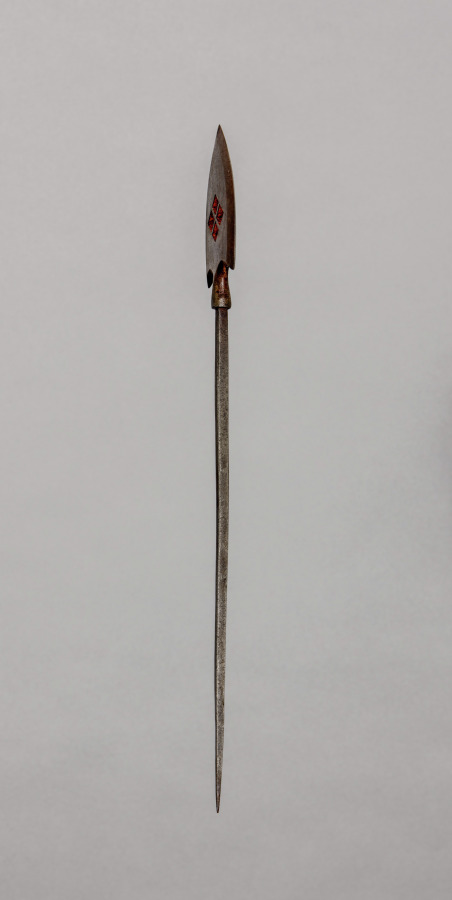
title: Arrow Head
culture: Japan, Edo period (1615–1868)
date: 1600s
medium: iron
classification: Arms and Armor